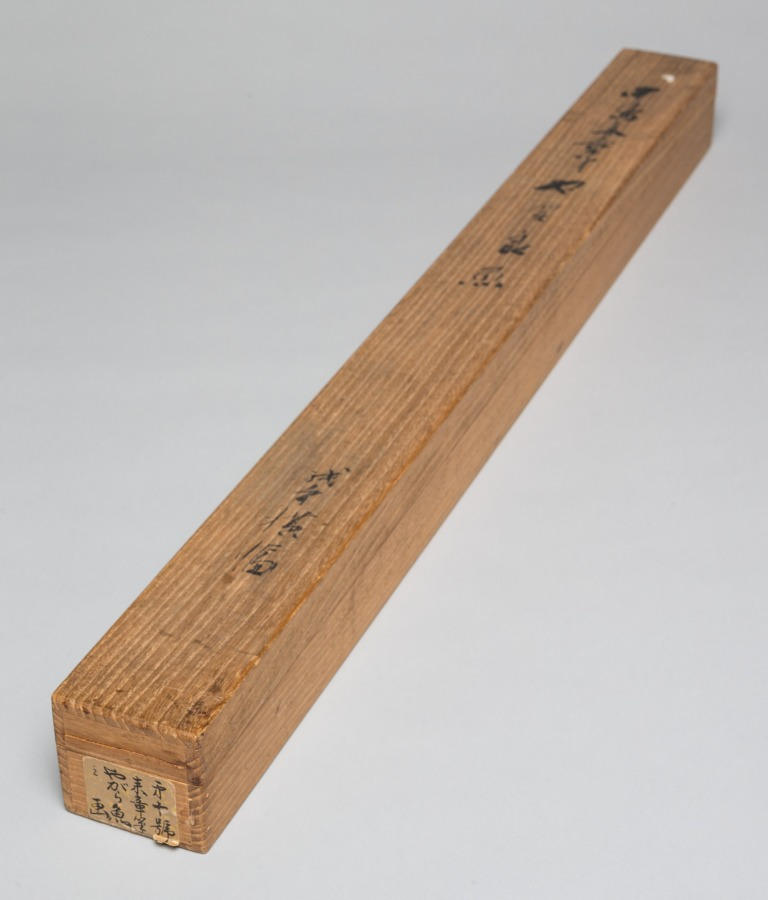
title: Needlefish (Yagara)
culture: Japan, Edo period (1615–1868)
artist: Nakajima Raishō (Japanese, 1796–1871)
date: 1870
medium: hanging scroll; ink and color on paper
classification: Painting